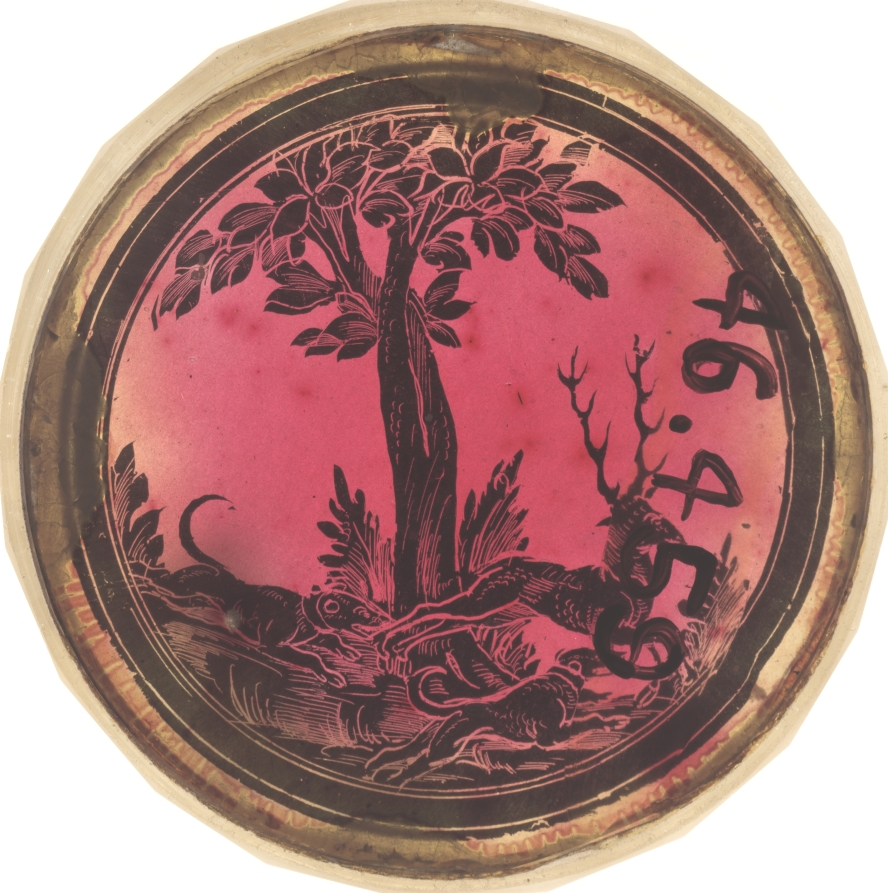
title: Tumbler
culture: Bohemia, 18th century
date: c. 1730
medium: zwischengoldglas (glass)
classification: Glass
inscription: in gold, around rim of glass: Monsigr. Daniel Delfino Patriarcha di Aguilleid